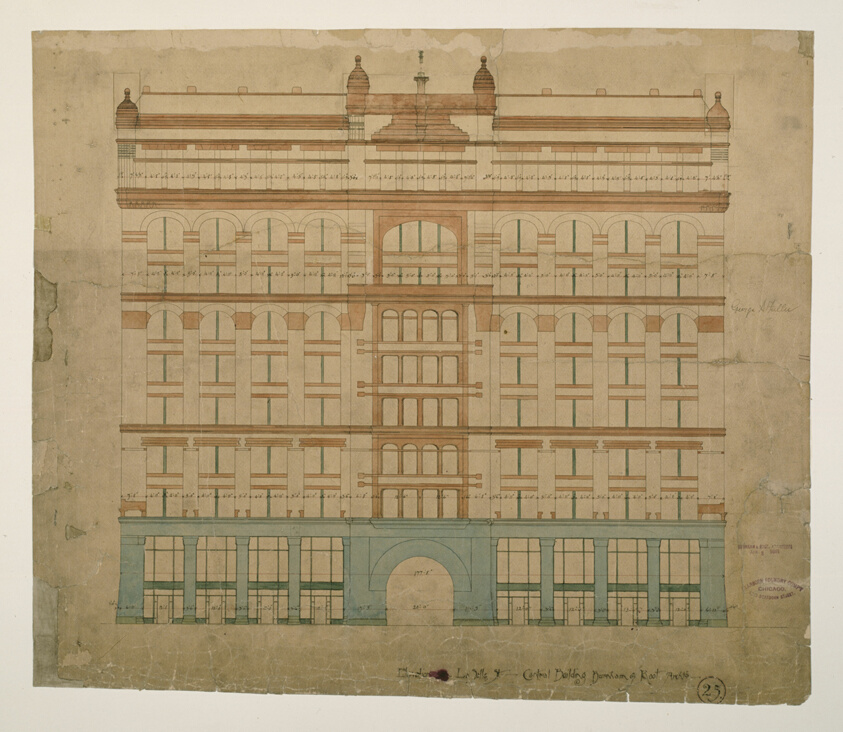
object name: Architectural Drawing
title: Rookery Building, Chicago, Illinois, LaSalle Street Elevation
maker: Burnham & Root; American, 1873–1891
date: 1885/87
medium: Multicolored hectograph print on heavy paper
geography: LaSalle Street, 209 South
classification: working drawing; architectural working drawing; architectural drawing; architecture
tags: Chicago, arches, architectural drawing, architecture, building, drawing, elevation, illinois, windows